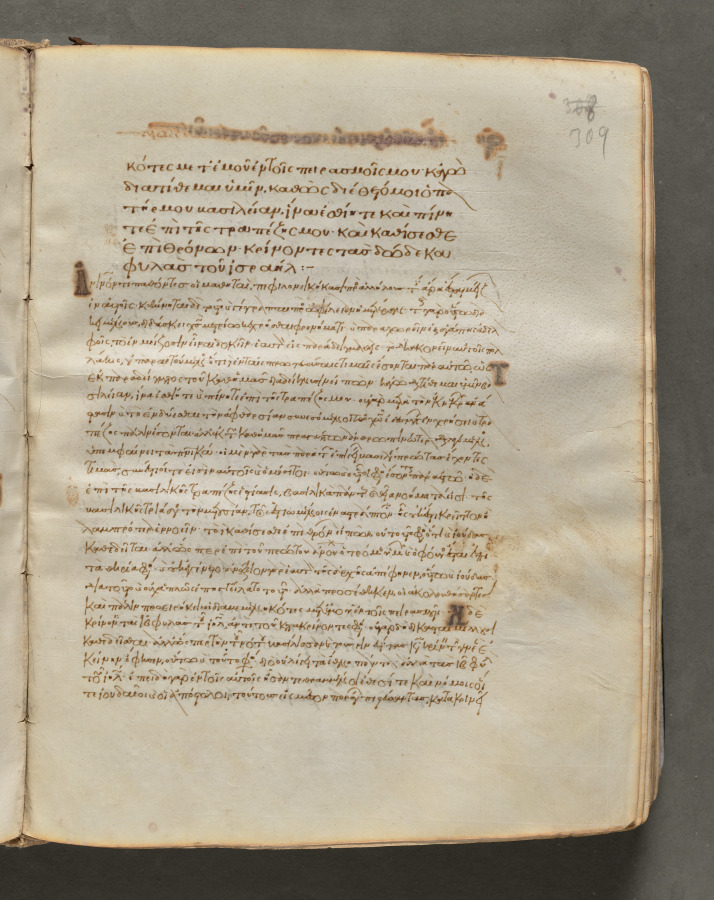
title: Text, folio 309 (recto), from a Gospel Book with Commentaries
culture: Byzantium, Constantinople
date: c. 1000–1100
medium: ink, tempera, and gold on vellum; leather binding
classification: Bound Volume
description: Each of the four gospels in this book opens on a page with brilliantly illuminated borders depicting the author of the text as well as birds—principally peacocks, symbols of the immortality of the soul—and fountains, representing the fountain of life and the salvation of the soul. This volume consists of 428 leaves with texts in Greek. Its level of sophistication suggests that it was probably written and decorated in a monastery in Constantinople.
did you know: Gospel books were carried in procession through Byzantine churches.